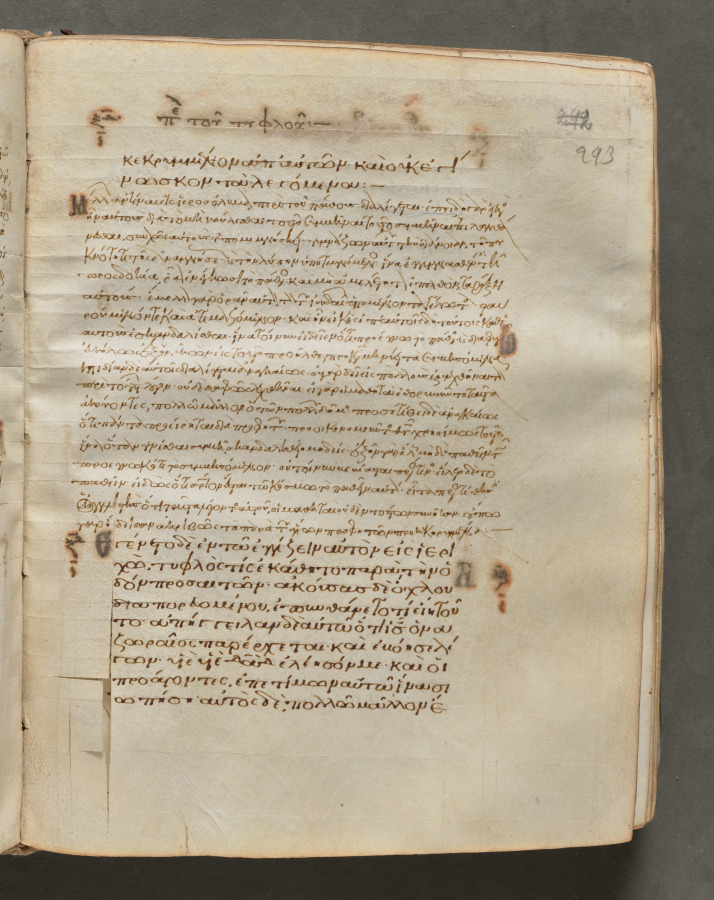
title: Text, folio 293 (recto), from a Gospel Book with Commentaries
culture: Byzantium, Constantinople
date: c. 1000–1100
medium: ink, tempera, and gold on vellum; leather binding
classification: Bound Volume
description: Each of the four gospels in this book opens on a page with brilliantly illuminated borders depicting the author of the text as well as birds—principally peacocks, symbols of the immortality of the soul—and fountains, representing the fountain of life and the salvation of the soul. This volume consists of 428 leaves with texts in Greek. Its level of sophistication suggests that it was probably written and decorated in a monastery in Constantinople.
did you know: Gospel books were carried in procession through Byzantine churches.